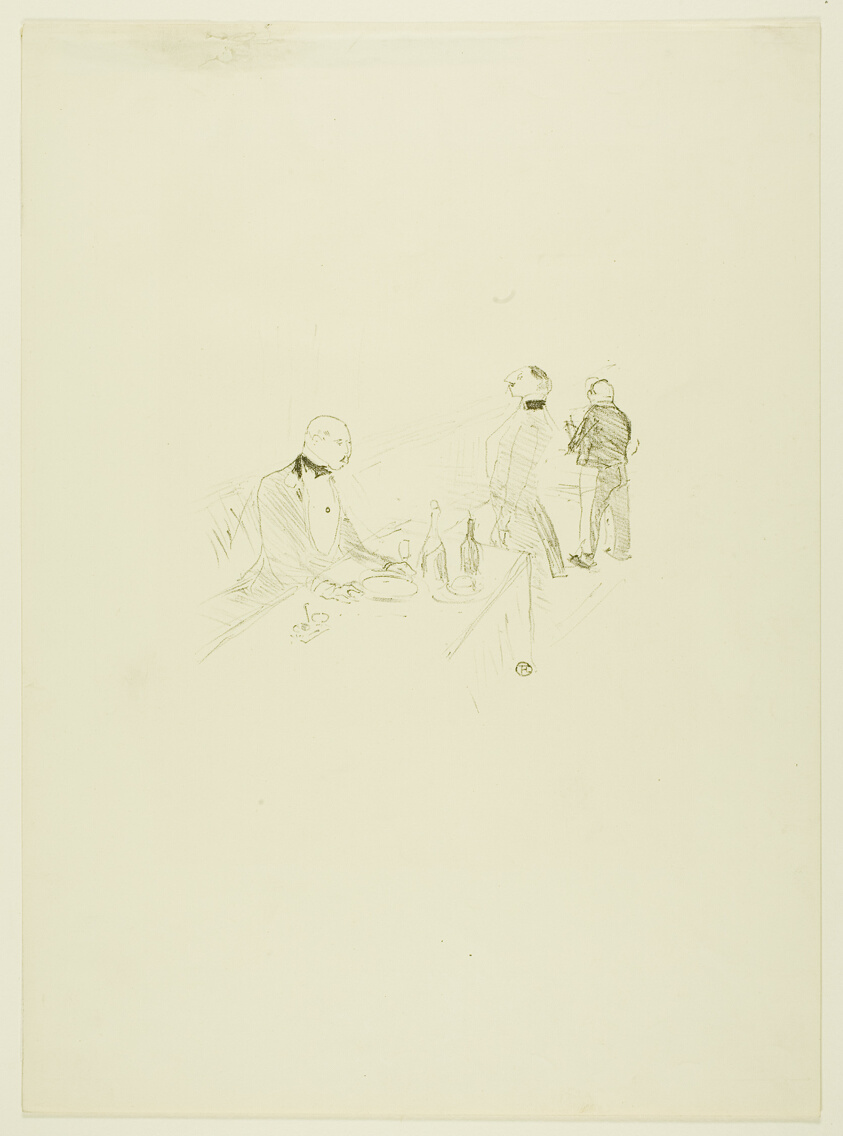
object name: Print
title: At the Maison d'Or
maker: Henri de Toulouse-Lautrec (French, 1864-1901)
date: 1897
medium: Color lithograph on ivory wove paper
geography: France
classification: lithograph; print; prints and drawing